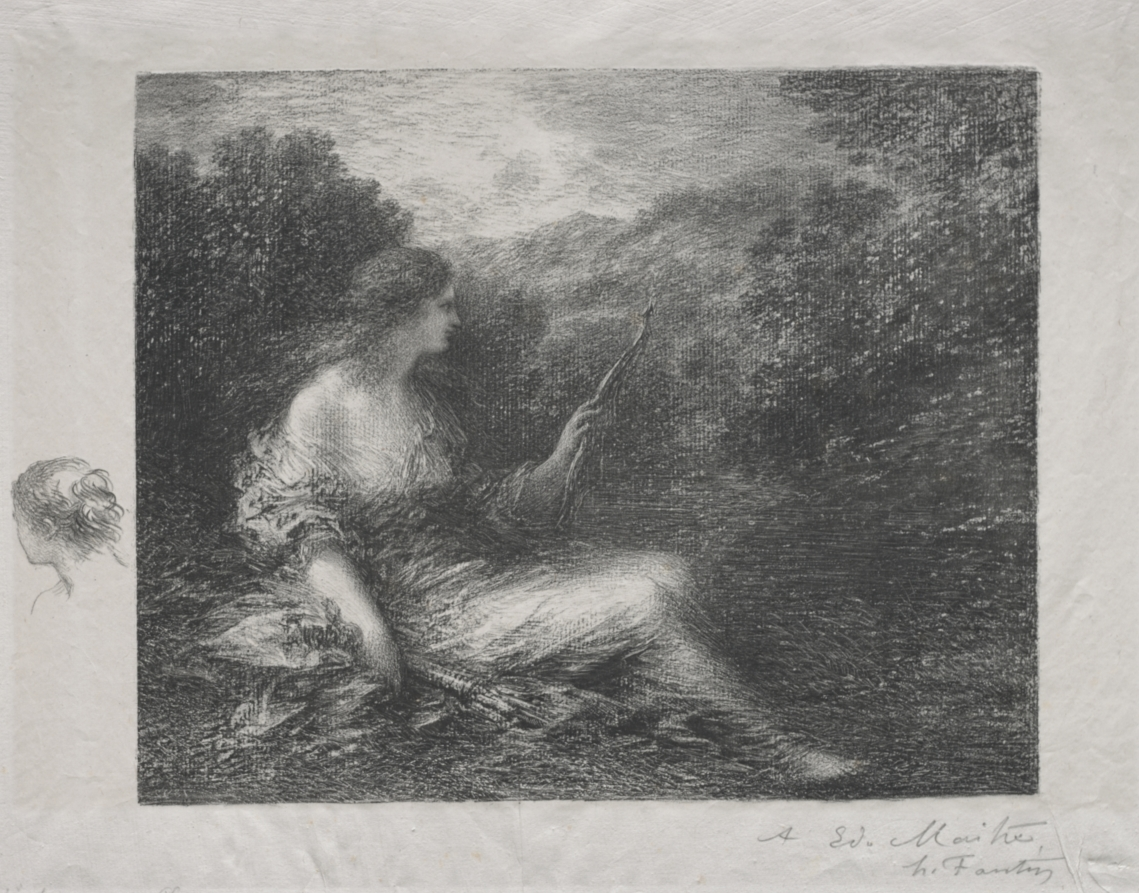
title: The Huntress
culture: France, 19th century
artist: Henri Fantin-Latour (French, 1836–1904)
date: 1892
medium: lithograph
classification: Print